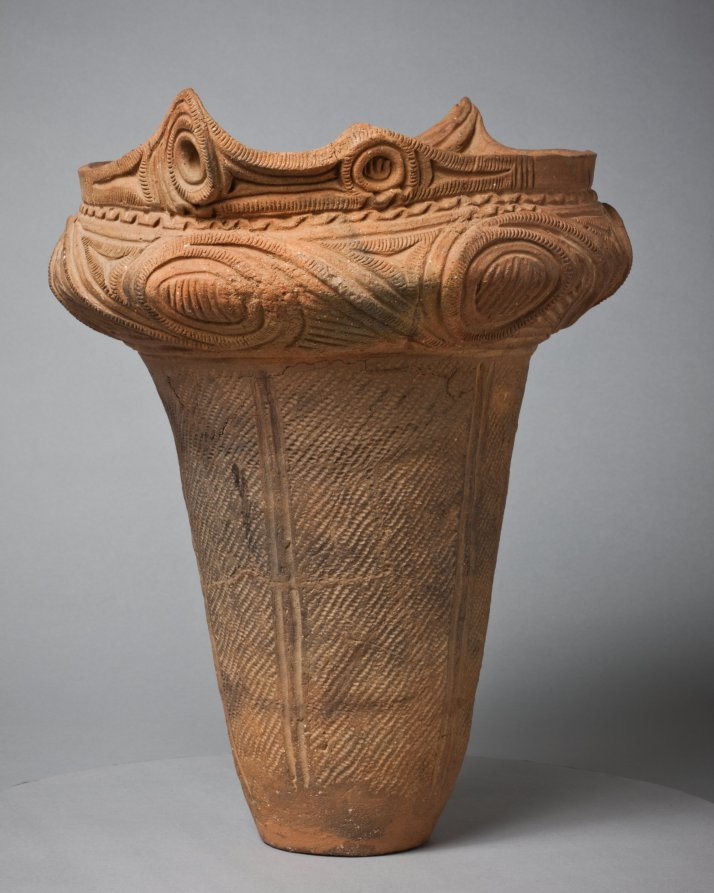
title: Urn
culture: Japan, Jōmon period (c. 10,500–300 BCE)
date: c. 2000 BCE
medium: earthenware, terracotta, impressed and incised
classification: Ceramic